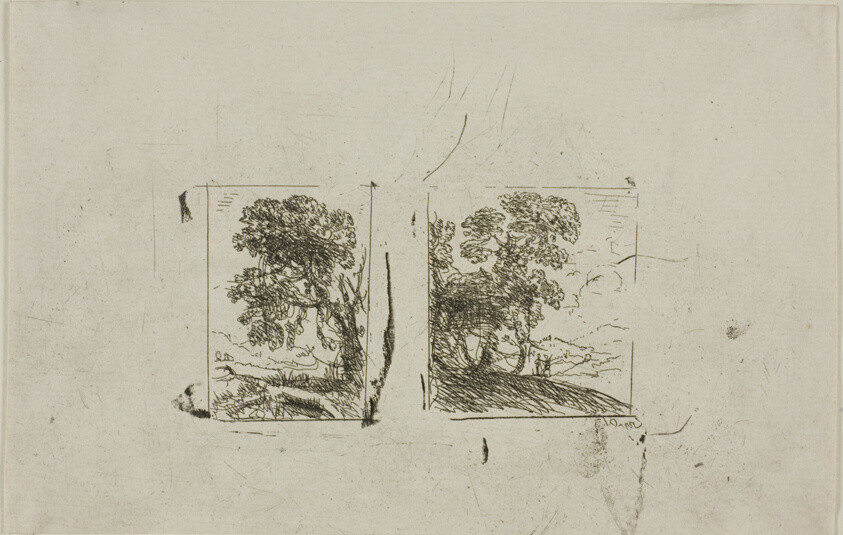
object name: Print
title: The Two Landscapes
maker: Claude Lorrain (French, 1600-1682)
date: c. 1630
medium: Etching on ivory laid paper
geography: France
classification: etching; print; prints and drawing